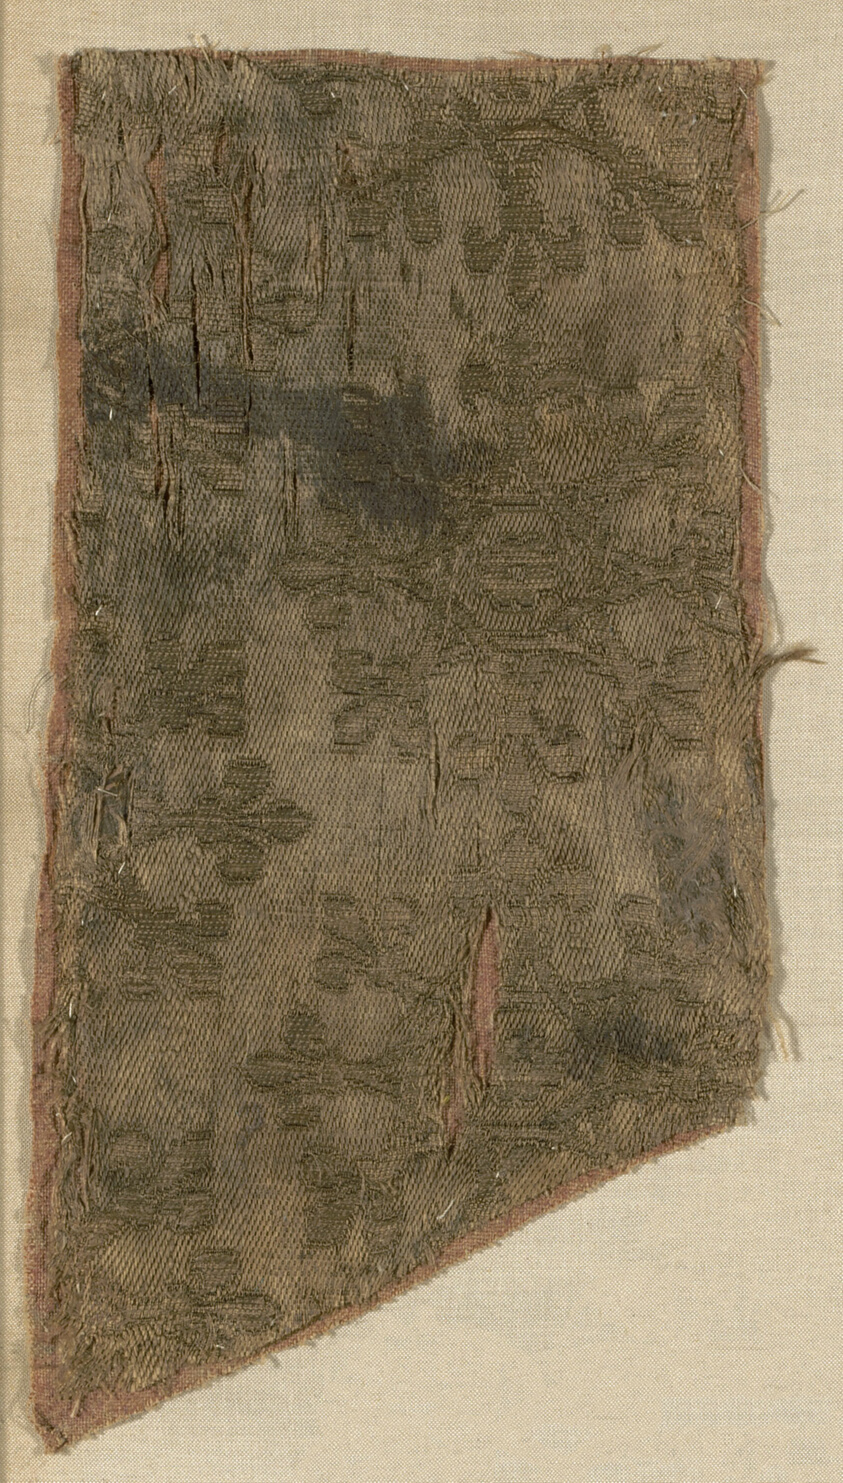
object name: Textile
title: Fragment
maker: Italy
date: 13th century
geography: Italy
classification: textile; weaving